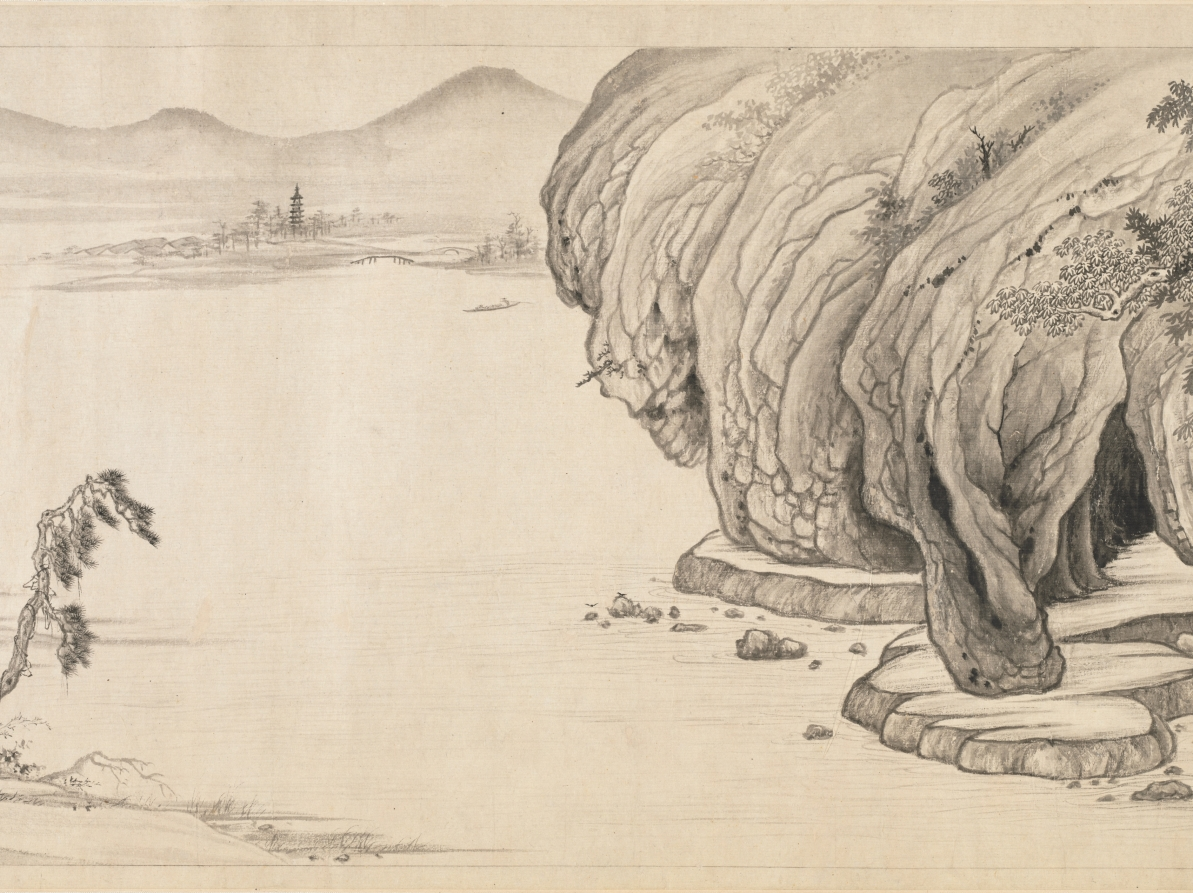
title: Meditative Visit to a Mountain Retreat: In Picture and in Words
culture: China, Ming dynasty (1368–1644)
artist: Xiang Shengmo (Chinese, 1597–1658)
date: 1648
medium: handscroll; ink on paper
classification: Painting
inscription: Artist's title and 3 seals (in front of painting): [title] Meditative Visit to a Mountain Retreat: In Picture and in Words 巖栖思訪圖詠 [3 seals] Tian lai ge zhong wen sun 天籟閣中文孫; Xiang shi kong zhang zui xin han mo 項氏孔彰醉心翰墨; Qing fu yuan zhong di yi miao ye 清福緣中第一妙業.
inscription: [印] 兔烏叟; 考古正今. 觀斯人兮何逍遙，非逍遙兮思其友。 思其友兮天一方，欲一訪之難回首。 松耶柏耶稱後凋，巖穴霏微何二酉。 山兮水兮人悠悠，遠莫致之神交否？ 河關一向望不及，言笑于今更非偶。 問游魚兮樂何深？問飛鳥兮歸何藪？ 問猿鶴兮何親疎？問鹿豕兮何夭壽？ 問白雲兮從何來？問流泉兮向何走？ 問漁樵兮何江山？問草木兮何畝畎？ 問春秋兮何炎涼？問世人兮何長久？ 問日月兮何晦明？曾見當時烏兔叟？ 戊子嘉平之初偶作此圖并題。 胥樵項聖謩識。 [印] 兔烏叟; 項氏孔彰; 未喪斯文.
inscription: 13 additional seals: 4 of Tang Zuomei 唐作梅 (late 18th–19th century); 3 of Zhang Baixi 張百熙 (1847–1907); 4 of Zhang Heng 張珩 (1915–1963); 2 unidentified.